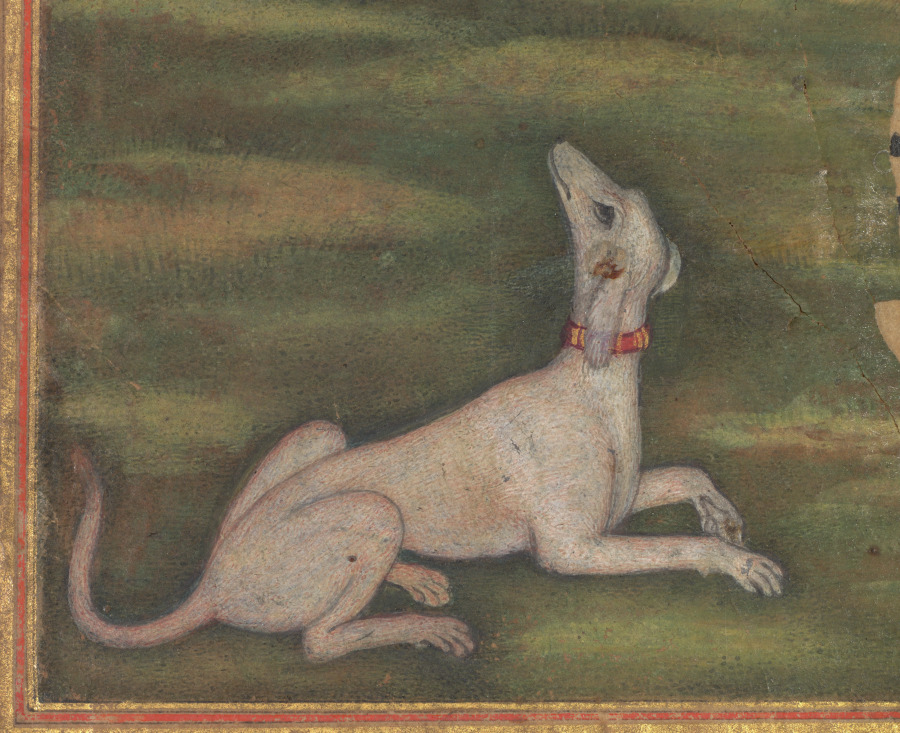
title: The Annunciation (folio 15 recto), from a Mirror of Holiness (Mir’at al-quds) of Father Jerome Xavier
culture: Mughal India, Allahabad, made for Prince Salim (1569–1627)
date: 1602–4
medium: Gum tempera, ink, and gold on paper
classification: Manuscript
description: Mary gazes down at the angel Gabriel as he kneels reverently, like a humble messenger, delivering the news that Mary will give birth to the son of God. His multicolored wings are forced within the boundary line of the painting field, visually implying a sense of subordination. Unlike many of the paintings in the Mirror of Holiness, the Annunciation is a familiar subject in European art, but the emphases vary. The Indian version depicts her as a queen, with a crown held above her head and attendants standing by.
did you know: The text states that Mary was only age 13 1/2 when the angel Gabriel came to her.